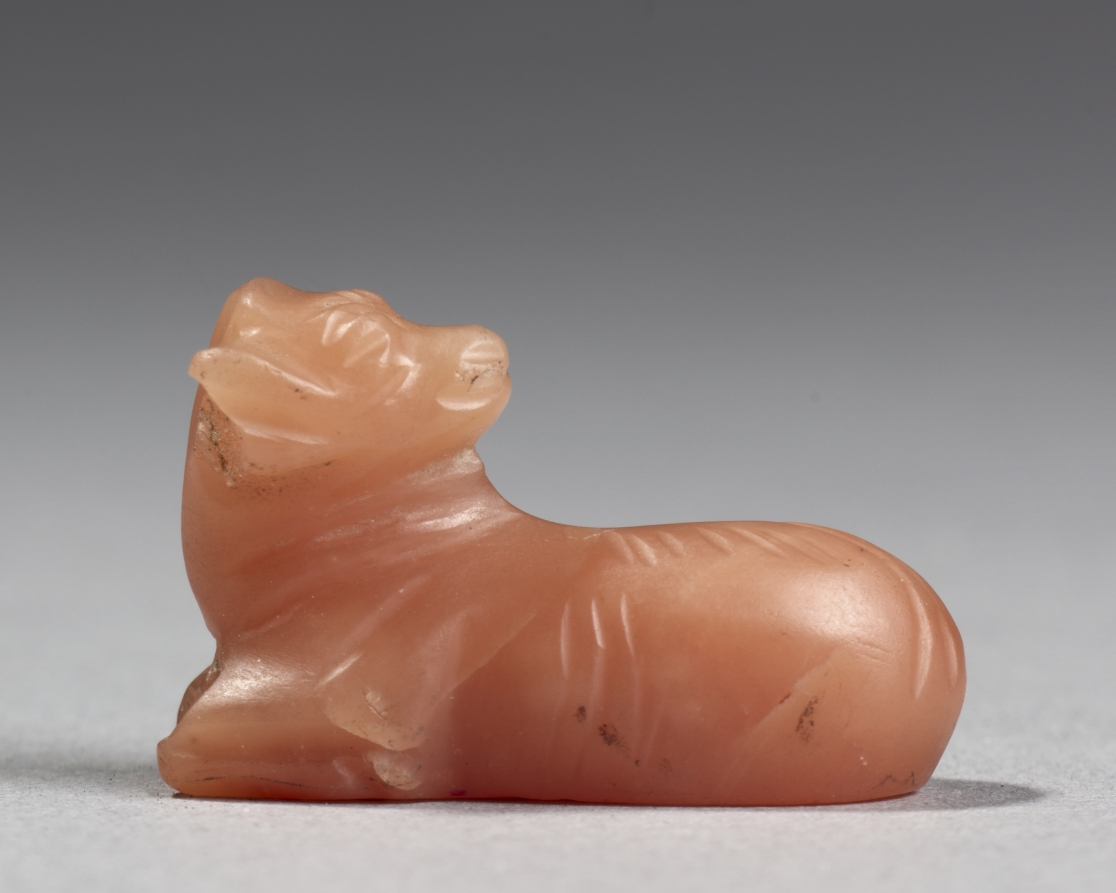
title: Recumbent Calf Amulet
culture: Egypt, New Kingdom (1540–1069 BCE), Dynasty 18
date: 1540–1296 BCE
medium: carnelian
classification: Amulets